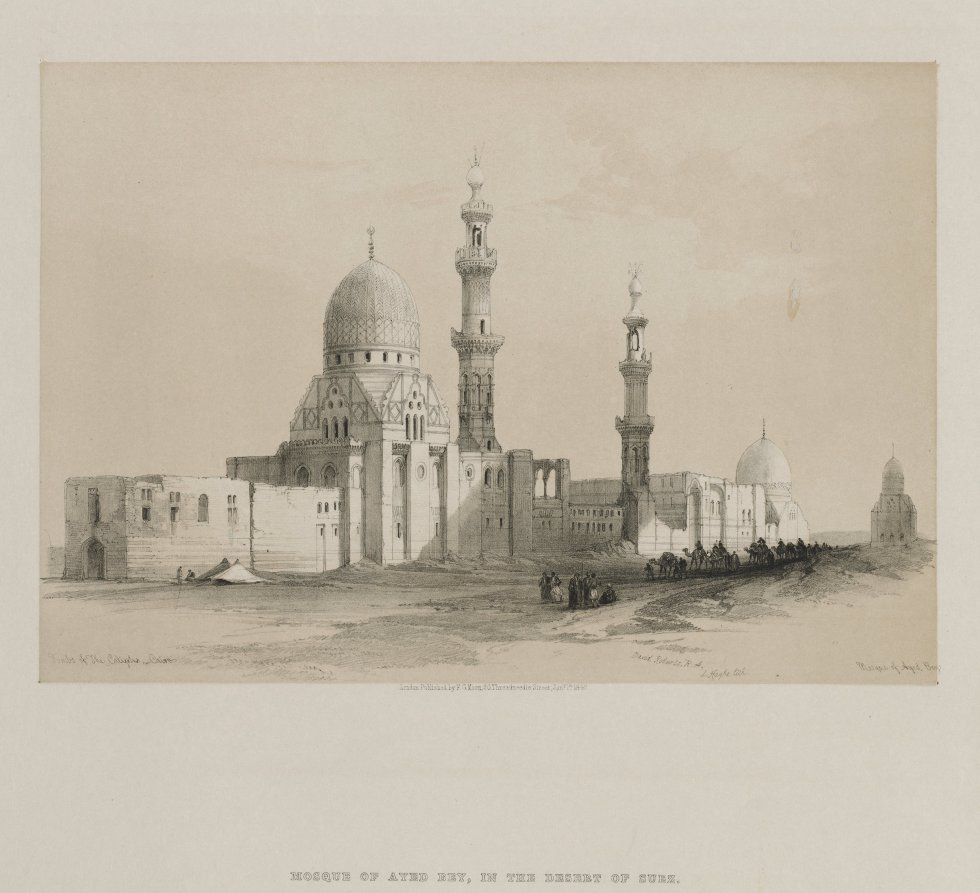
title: Egypt and Nubia, Volume III: Tombs of the Caliphs-Cairo. Mosque of Ayed Be[y]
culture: England, 19th century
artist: Louis Haghe (British, 1806–1885)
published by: F. G. Moon, 20 Threadneedle Street, London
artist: after David Roberts (Scottish, 1796–1864)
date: 1849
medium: color lithograph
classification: Print